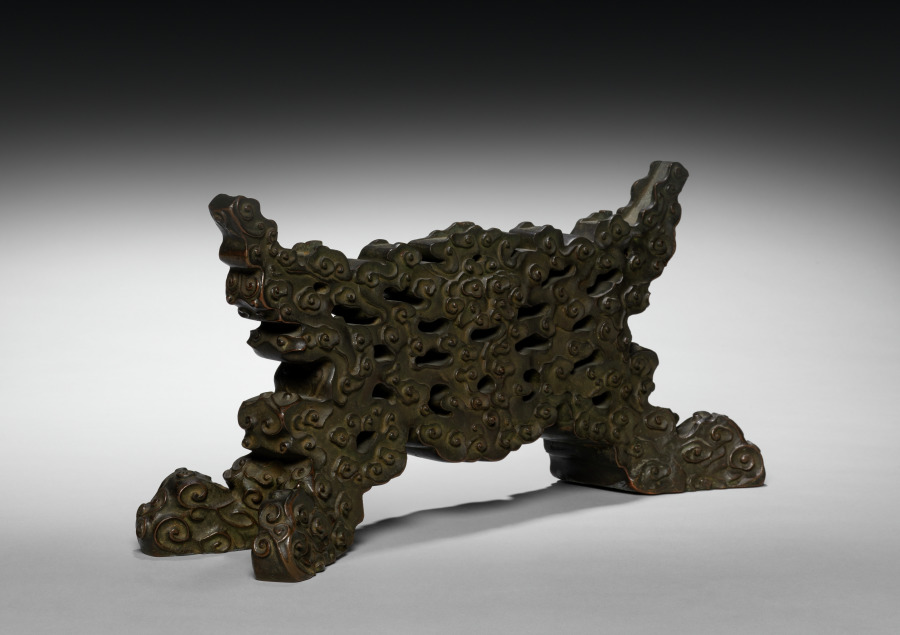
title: Stand for Screen with European Figures (obverse) and Landscape (reverse)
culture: China, Beijing palace workshops, Qing Dynasty (1644-1911), Qianlong reign (1736-1795)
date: 1736–95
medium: cast iron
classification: Metalwork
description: This is a cast-iron stand for a two-sided table screen. One side of the screen is an enamel-painted copper plaque with European figures. The reverse side is a glass painting of architectural landscape in the Chinese style.